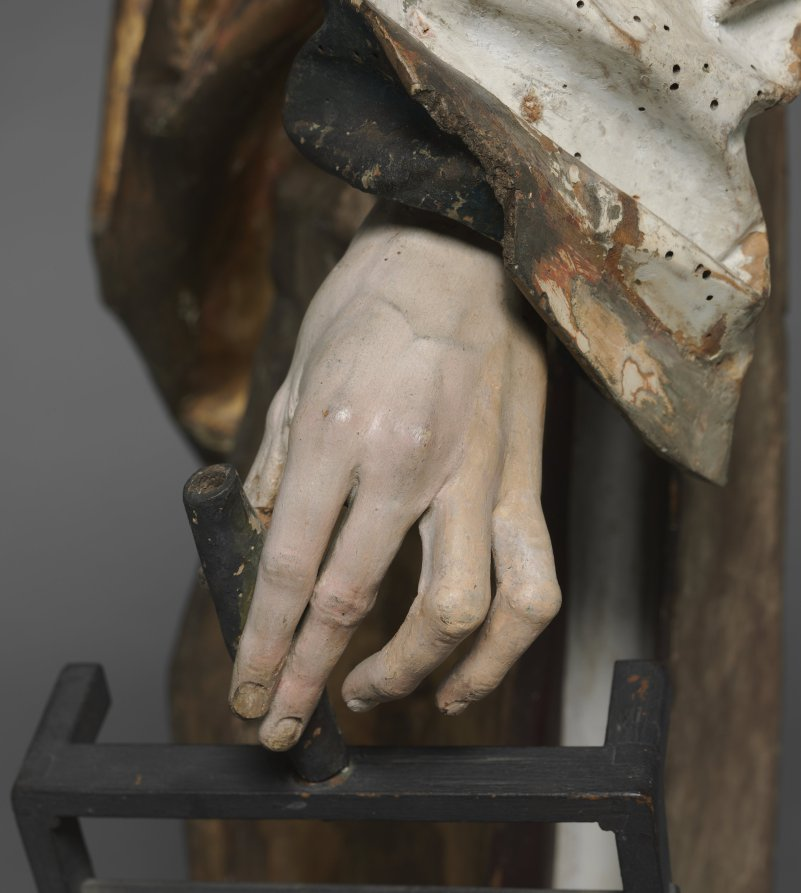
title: Saint Lawrence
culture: Germany, Würzburg, 16th century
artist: Tilman Riemenschneider (German, active Würzburg, c. 1460–1531)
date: 1502–8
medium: lindenwood with polychromy and gilding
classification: Sculpture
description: This sculpture, along with that of Saint Stephen (1959.43), and two female saints preserved in Frankfurt (Historisches Museum), are believed to be the remaining fragments of a large altarpiece carved by Riemenschneider for the Dominican convent in Rothenburg in Franconia (demolished in 1813). Saints Stephen and Lawrence both wear the dalmatic to indicate their status as deacons in the early church. Each holds a symbol of his martyrdom; here, Saint Lawrence holds a grill to indicate his death by burning. Late Gothic Style Art in Germany through the early 1500s remained firmly anchored in the late Gothic style with its associated interests in realism. Riemenschneider was one of the most prolific and versatile sculptors of this style, a recognized master in both stone and wood. His flourishing workshop employed as many as 40 apprentices in sculpting, woodcarving, and painting. His sculptures are noted for the dreamy, melancholy, and introspective quality in their expressions, as well as their remarkable attention to detail.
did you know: Before Riemenschneider finally settled in Würzburg, Germany, in 1484, he traveled to Strasbourg and Colmar, where he became acquainted with the works of the engraver Martin Schongauer.